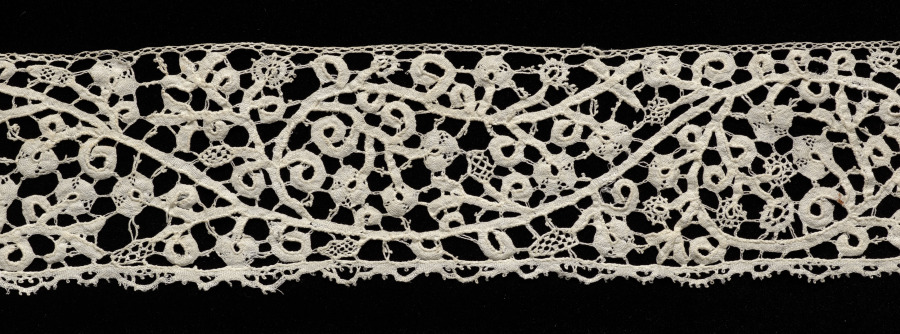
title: Lace Edging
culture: Italy, Milan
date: 1500s–1600s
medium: Linen: bobbin lace (cantu)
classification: Lace